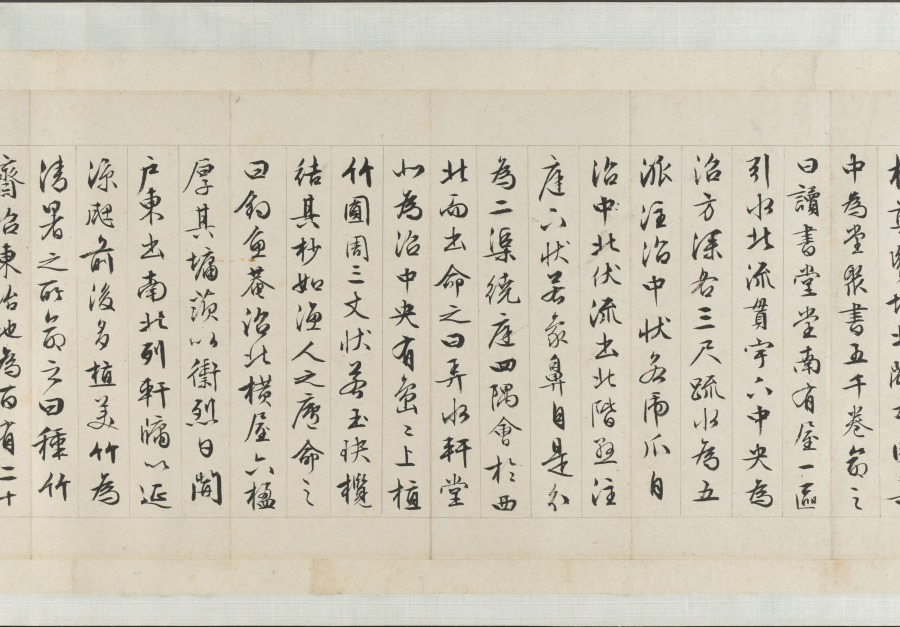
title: Garden for Solitary Enjoyment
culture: China, Ming dynasty (1368–1644)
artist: Qiu Ying (Chinese, 1494–1552)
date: 1515–52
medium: Handscroll; ink and light color on silk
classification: Painting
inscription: Accompanying text of an essay together with seven poems of Sima Guang (1019–1086) and one poem of Su Shi (1037–1101) written by Wen Zhengming (1470–1559) in 1558.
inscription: 2 colophons and 82 seals: 4 seals of Wen Zhengming 文徵明 (1470–1559); 59 seals of Xiang Yuanbian 項元汴 (1525–1590); 1 colophon, dated 1644, and 7 seals of Xiang Yukui 項禹揆 (c. late 1500s–1659); 1 colophon, dated 1880, and 2 seals of Weng Tonghe 翁同龢 (1830–1904); 2 seals of Ch'eng Chen-i (19th c.); 1 seal of Han Ch'ung (19th c.); 4 seals of Wan-go H. C. Weng 翁萬戈 (1918–2020); 3 seals unidentified.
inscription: Colophon by Xiang Yukui 項禹揆 (c. late 1500s–1659): The painting of The Garden for Self-enjoyment on the right by Shih-chou, Mr. Qiu [Qiu Ying] is in the style of Li Lung-mien. Its mood is peaceful, as if meeting the ancient gentlemen face to face among the brushes and silk; it lifts one above the sordid bustle of life. Formerly, my late father handed me this scroll which had only the painting without the written essay. I considered asking a good calligrapher to write the essay to add to it but was afraid that the quality of the writing would not match the painting. Several years later, I saw at a friend's house this essay and poems (of Ssu-ma Kuang] written by Hengshan [Wen Zhengming], once owned by my grandfather; so I spared no expense to obtain it. I rejoiced at this and said: "The divine swords are finally united. How things are pre-destined!" Now my friend Chang Kung-chao's technique for mounting [painting and calligraphy] is excellent. Therefore by daring to take them out and join them together, I can preserve this beautiful story of singular reunion. Xiang Yukui recorded at Hai-yeh-t'ang [hall] two days before New Year's Eve in the jiasheng year of the Chongzhen era [1644]. trans. LYSL/HK/WKH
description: Garden of Solitary Enjoyment refers to a site built in 1073 by the statesman Sima Guang (1019–1086) after he had retired to Luoyang, Henan province. Every spring, visitors would flock to his garden. Each of its seven structures references a historic figure. Sima wrote: I channel streams [like Du Mu], to water flowers [like Bai Juyi], or trim bamboo [like Wang Huizhi]. . . . I know of no joy between heaven and earth that could take its place. Qiu Ying’s painting, created after an 11th-century version of the same theme, must have appealed to garden owners of the Ming dynasty, since it became the template for numerous Suzhou workshop copies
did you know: Sima Guang completed his monumental survey of Chinese history, Zizhi tongjian, in the garden depicted in this painting.